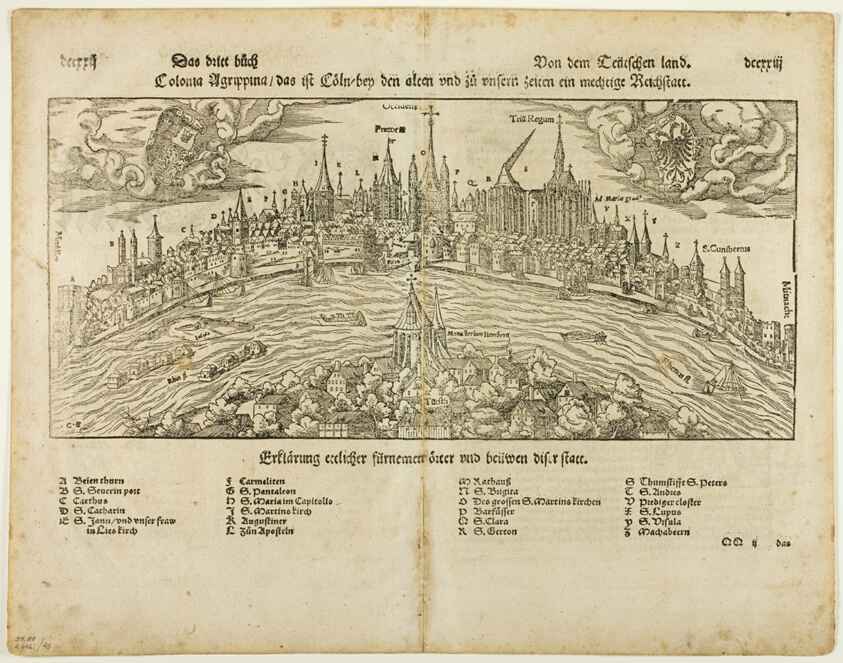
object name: Print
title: View of Cologne (recto) Man Hanged from a Tree (verso), Two leafs DCCXXI-DCCXXIIII from Kosmographie by S. Münster, plate 45 from Woodcuts from Books of the XVI Century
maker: Hans Rudolf Manuel Deutsch (Swiss, 1525-1572); assembled by Max Geisberg (Swiss, 1875-1943)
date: 1564, assembled into portfolio 1937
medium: Woodcut on paper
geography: Switzerland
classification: woodcut; print; prints and drawing